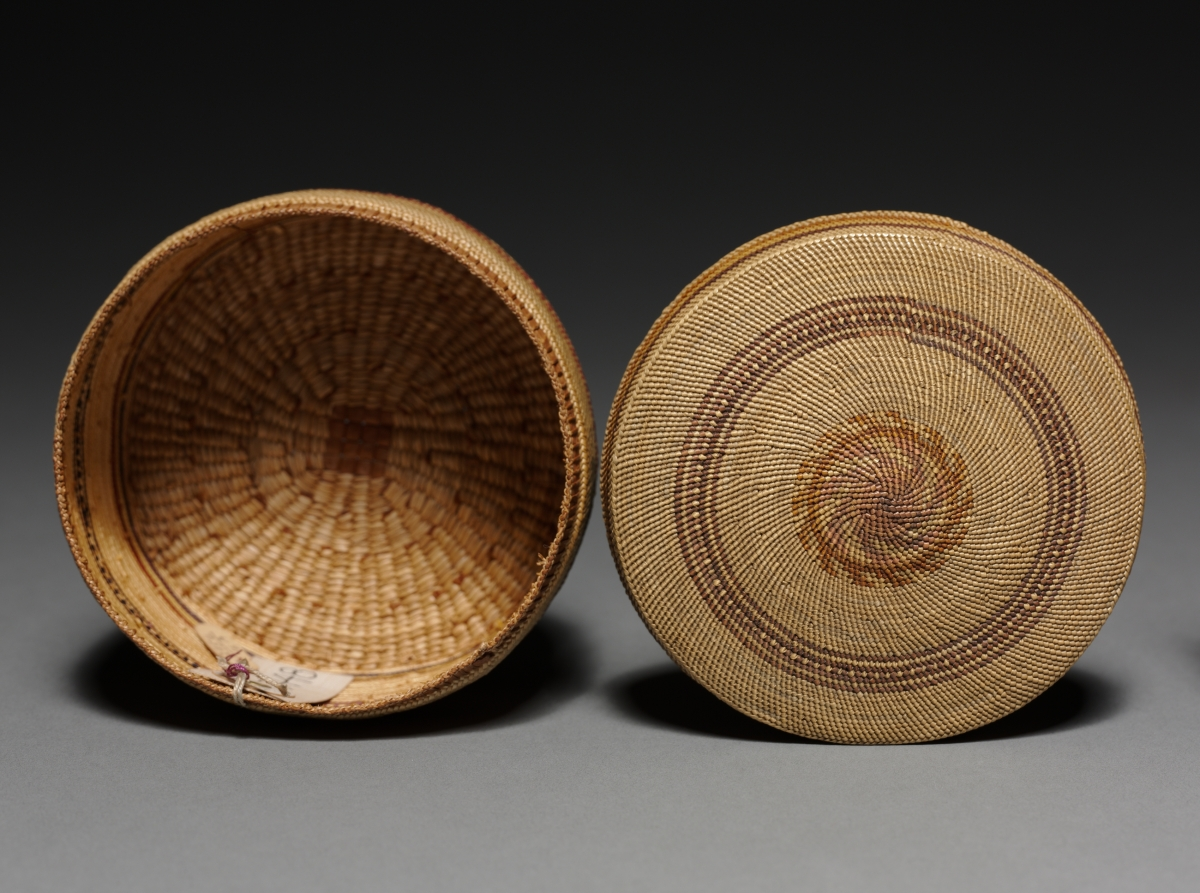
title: Lidded Bowl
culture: Northwest Coast, Makah, late 19th century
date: c 1900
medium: Cedar bark, deer grass; wrapped twining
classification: Basketry